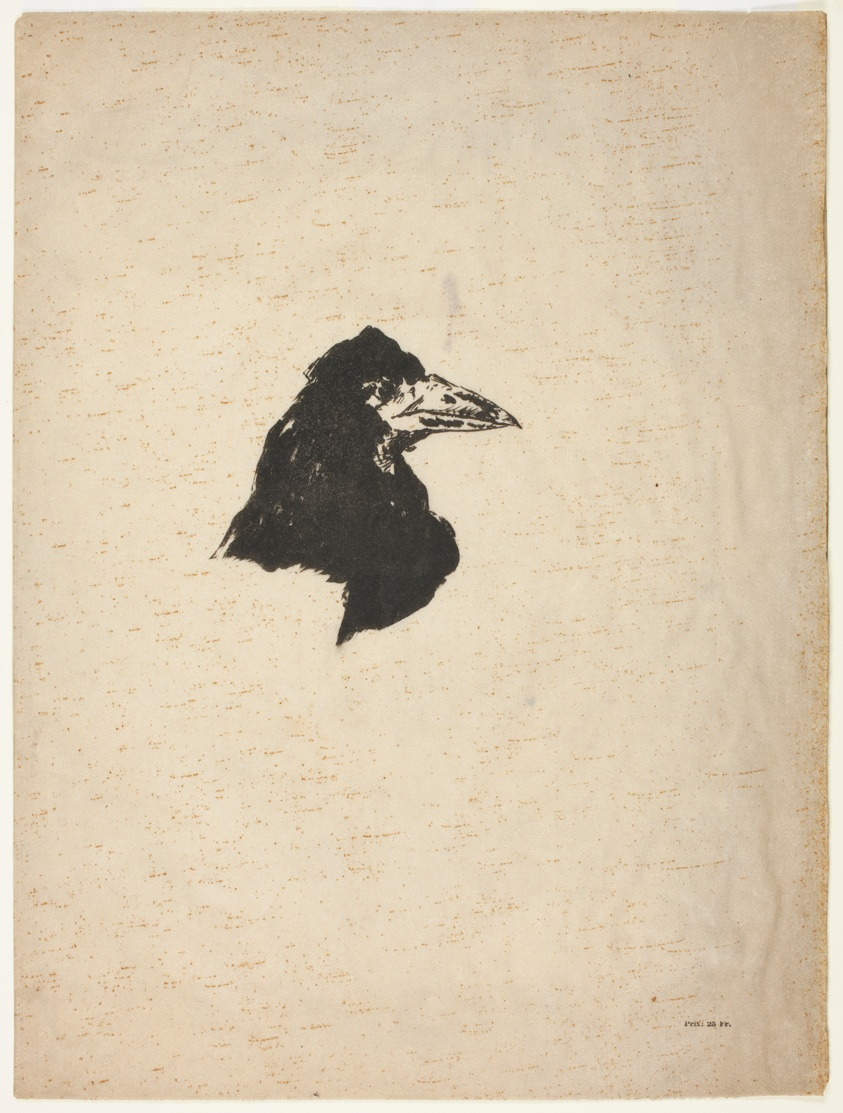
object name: Print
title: Head of a Raven in Profile, from The Raven (Le Corbeau)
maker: Édouard Manet (French, 1832-1883); written by Edgar Allan Poe (American, 1809-1849); translated and produced by Stéphane Mallarmé (French, 1842-1898); printed by Lefman et Cie. (French, 19th century); published by Richard Lesclide (French, 1825-1892)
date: 1875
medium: Transfer lithograph in black on tan simili-parchment paper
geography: France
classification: gillotage; print; prints and drawing